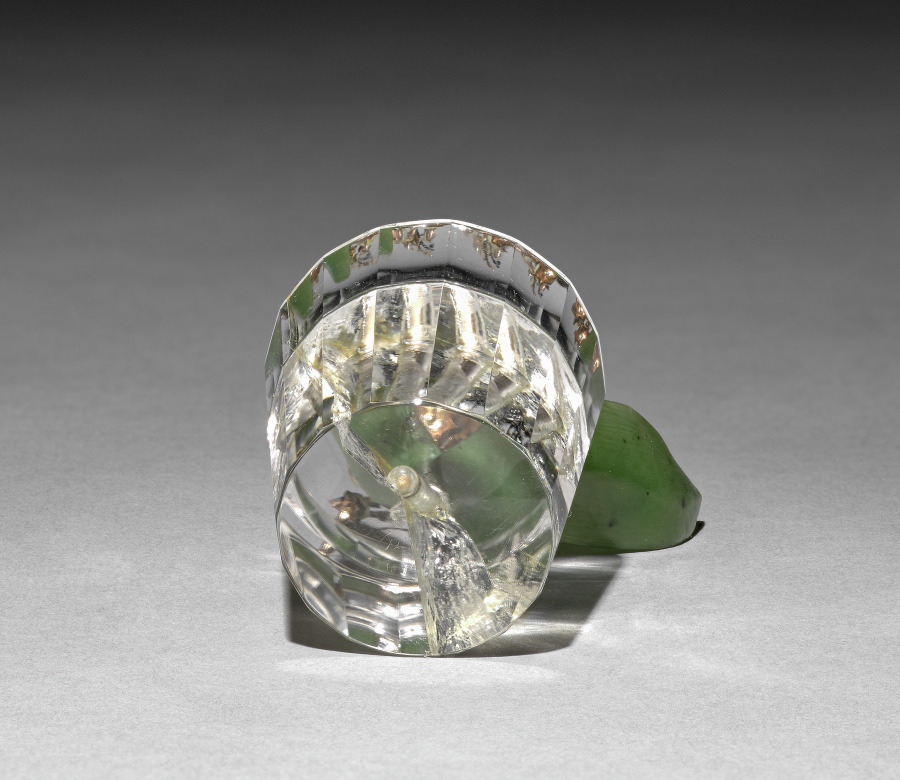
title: Flower Study of a Lily of the Valley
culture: Russia, St. Petersburg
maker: House of Fabergé (Russian, 1842–1918)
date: c. 1885–1915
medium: pearls, diamonds, jade, rock crystal, silver, gold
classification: Miscellaneous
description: This flower study resembles a stem of lily-of-the-valley. Fabergé’s inspiration for his flower studies is said to have come from the floral brooches of precious stones that were made in the 1700s for Catherine the Great as well as from the Japanese art of flower arranging, known as ikebana. Small and delicate, Fabergé’s flower studies were given as intimate gifts to friends by the tsarina and others in the court. She also liked to take them around to wherever the imperial family was residing as a reminder of spring during the harsh Russian winters.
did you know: The stems of Fabergé’s flower studies are set into little basins carved from rock crystal to resemble pots of water.